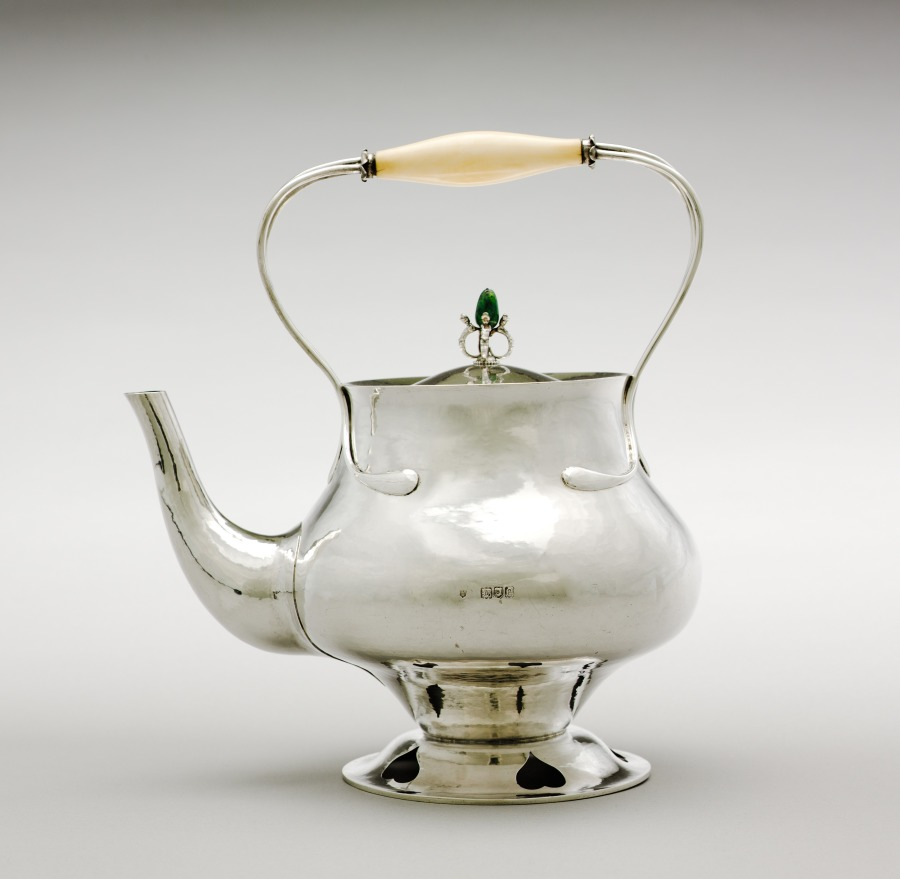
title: Kettle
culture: England, late 19th-early 20th Century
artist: Charles Robert Ashbee (British, 1863–1942)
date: 1900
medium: silver with ivory handle and chrysoprase finial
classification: Silver